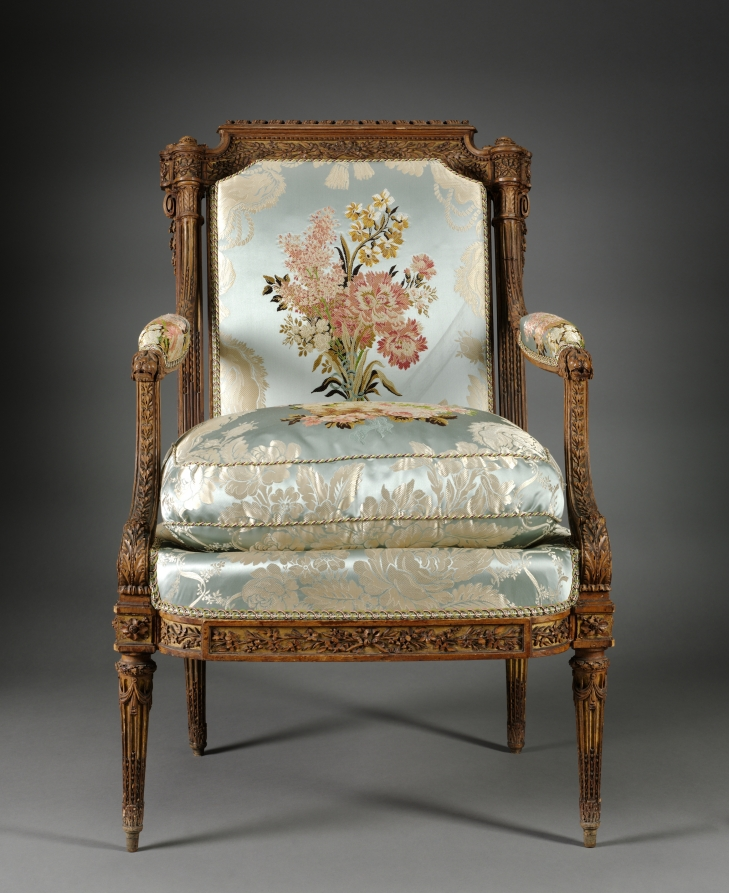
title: Armchair (Fauteuil) (1 of 2)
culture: France, 18th century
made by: Nicolas-Denis Delaisement (French)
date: c. 1785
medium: boxwood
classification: Furniture and woodwork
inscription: signed on back of frame of seat underneath: Delaisement with inverted "s."